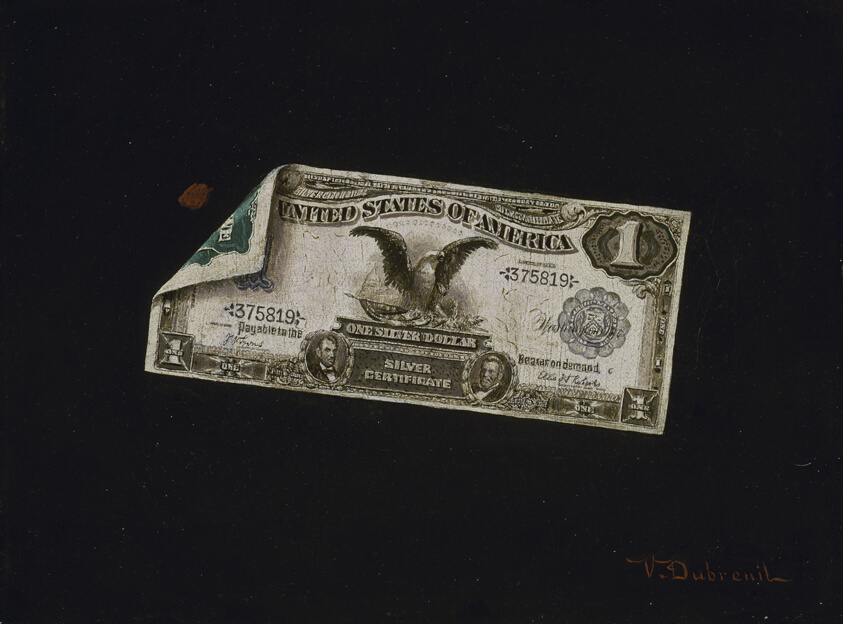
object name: Painting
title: One Dollar Silver Certificate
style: Realism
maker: Victor Dubreuil (American, born France, 1842–after 1910)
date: 1898–1900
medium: Oil on canvas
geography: New York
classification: painting; american arts